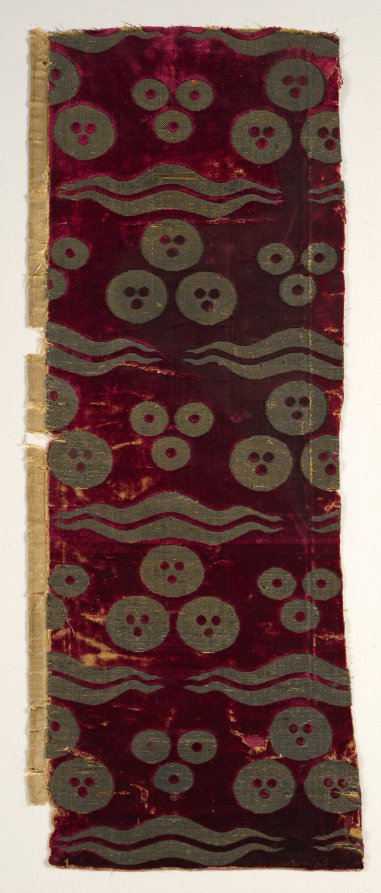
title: Brocaded velvet with chintamani design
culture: Turkey, Bursa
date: late 1400s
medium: velvet, brocaded: silk and silver-metal thread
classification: Velvet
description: This early Ottoman brocaded velvet was woven in an imperial workshop in the prosperous city of Bursa, the silk capital and major commercial center of the Ottoman Empire. It has exceptionally rich crimson silk pile, almost twice as dense as later monochrome velvets. The brocaded pattern of three balls and paired wavy bands is known as chintamani, derived from the Sanskrit word for a popular Buddhist motif, “the three jewels,” shown surrounded by flames or foliage in Buddhist art across Asia. Based on the high frequency of its use in art for the Islamic court of the Ottoman Turks, it appears to have been a favored motif and possibly even an unofficial imperial emblem.